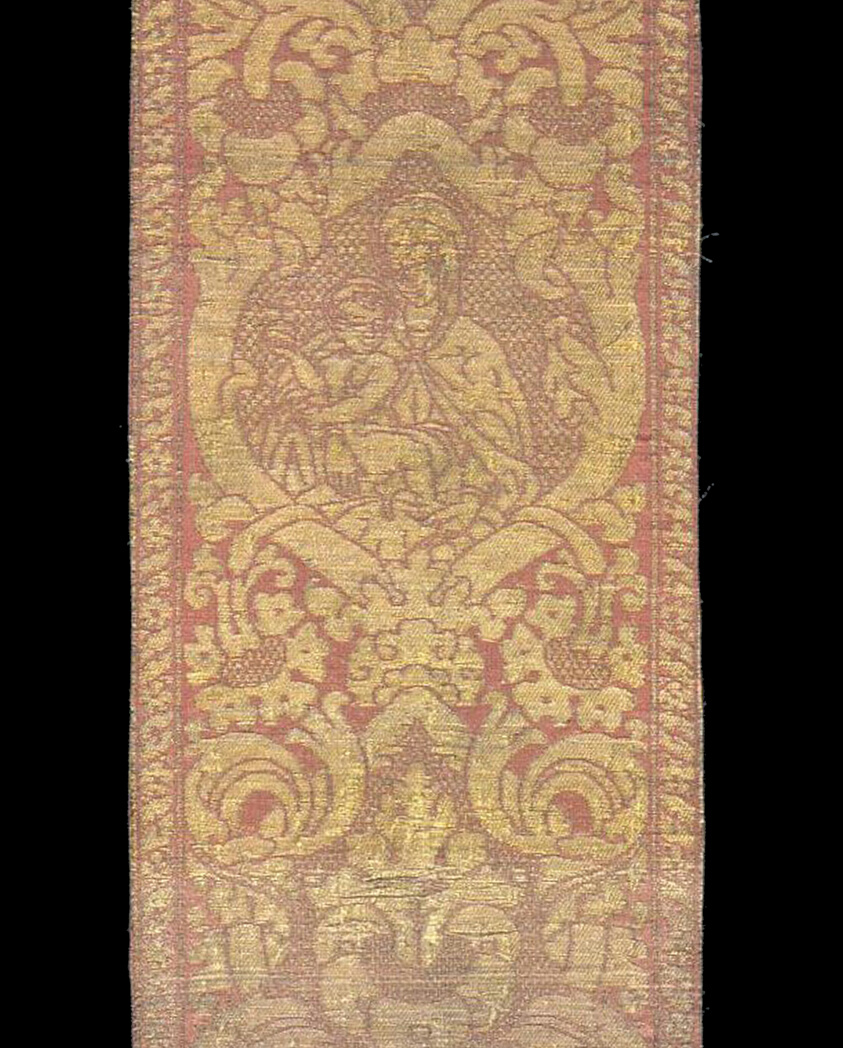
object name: Textile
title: Orphrey Band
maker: Italy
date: 15th century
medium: Silk, gold gilt strip wound around linen fiber core, integrated compound-weave of warp-float faced satin weave and twill weave with supplementary patterning wefts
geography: Italy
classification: textile; weaving; liturgical